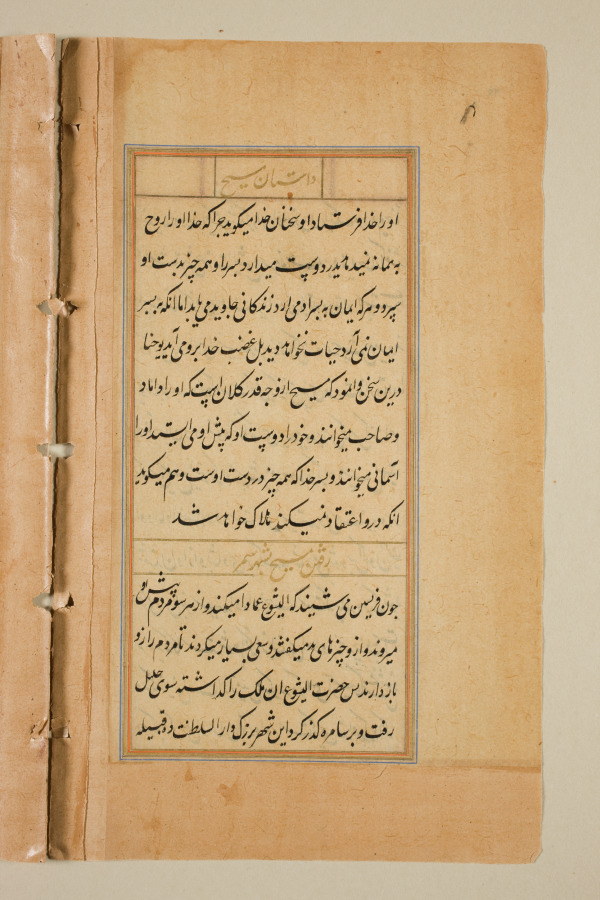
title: Text page from a Mirror of Holiness (Mir’at al-quds) of Father Jerome Xavier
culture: Mughal India, Allahabad, made for Prince Salim (1569–1627)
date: 1602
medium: Ink and gold on paper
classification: Manuscript